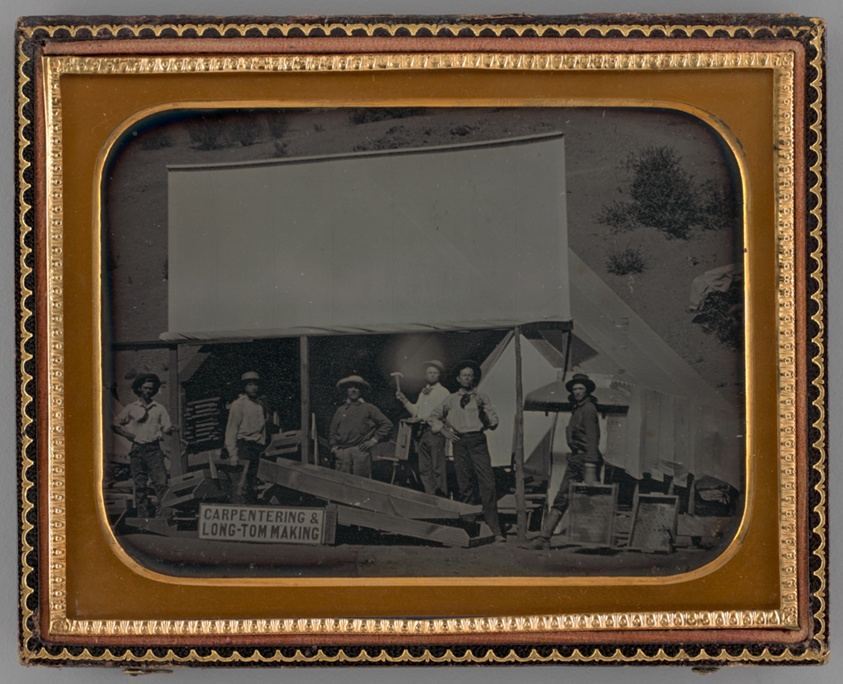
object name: Photograph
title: Untitled (Group of Carpenters)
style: 19th century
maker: Unknown maker; American, 19th century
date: 1855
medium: Daguerreotype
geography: United States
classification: portrait; photography; photographic process; photograph; daguerreotype; portrait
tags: lundberg collection, portraits: multiple subjects, portraits: male subject, portrait, people, men, Male, gold rush, gold mining